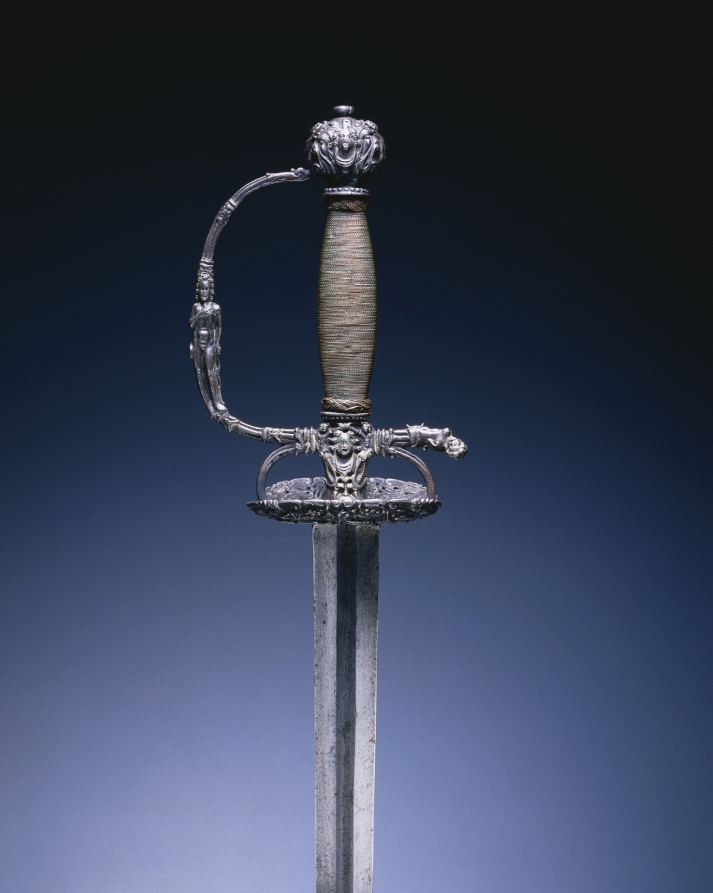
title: Small Sword with Masks and Figures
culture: hilt: Holland, blade: Germany, Solingen, 17th century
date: c. 1660–80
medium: steel; chiseling; copper wire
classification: Arms and Armor